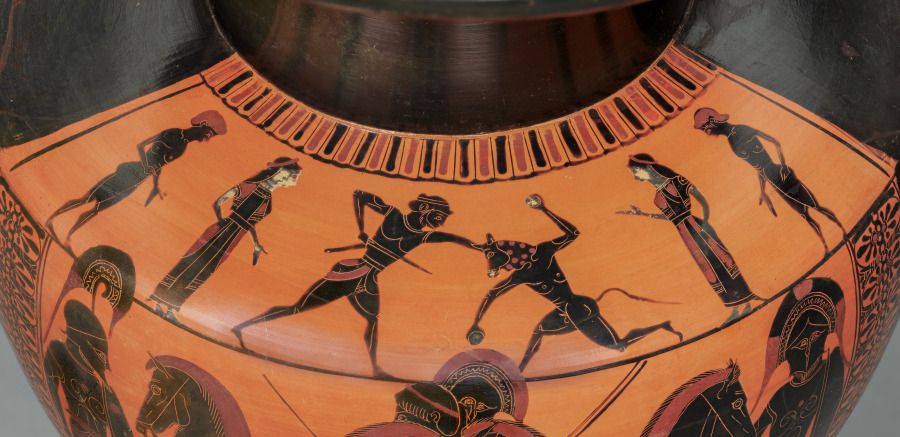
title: Black-Figure Hydria (Water Vessel): Frontal Quadriga (Body); Theseus and Minotaur (Shoulder)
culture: Greece, Attic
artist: attributed to Antimenes Painter (Greek, Attic, active c. 530–510 BCE)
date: c. 520 BCE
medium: ceramic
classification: Ceramic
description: Although their subjects differ, the three fields of figured decoration on this vessel relate to one another metaphorically through the theme of victory. Just as Theseus defeats the Minotaur on the shoulder, two lions converge on a deer in the predella (the small, lowermost panel). In the largest panel, victory is still to come, presumably for all three warriors shown: one in the chariot behind his driver, and one on foot on either side. Somewhat unusually, two of the warriors look directly out at the viewer, their frontal faces an interesting complement to the much more common frontal chariot.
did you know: This type of water vessel, a hydria, takes its name from hudor, Greek for water (and still familiar in the English root hydro).